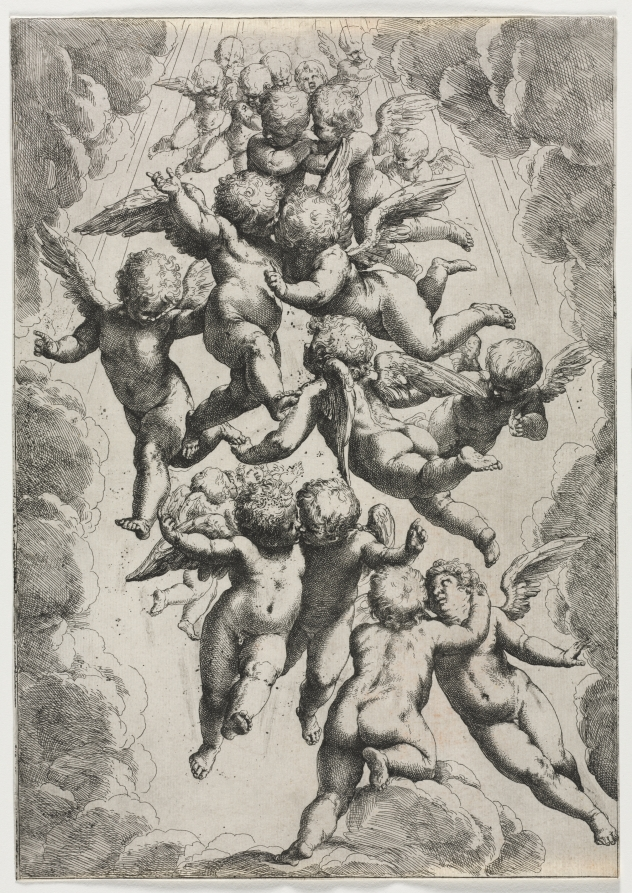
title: Angels in Glory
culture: Italy, 17th century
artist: Guido Reni (Italian, 1575–1642)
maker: after Luca Cambiaso (Italian, 1527–1585)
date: c. 1607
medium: etching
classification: Print